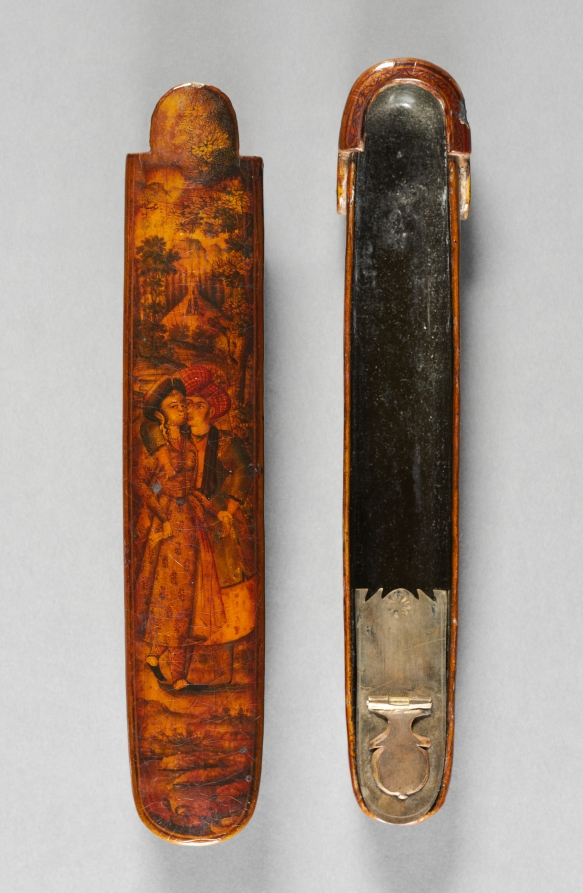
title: Pen and Ink Box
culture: Iran, probably Isfahan, Safavid period (1501–1722)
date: 1667–98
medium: Varnished lacquer and opaque watercolor over papier-mâché, ink, and copper alloy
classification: Lacquer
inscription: 1109